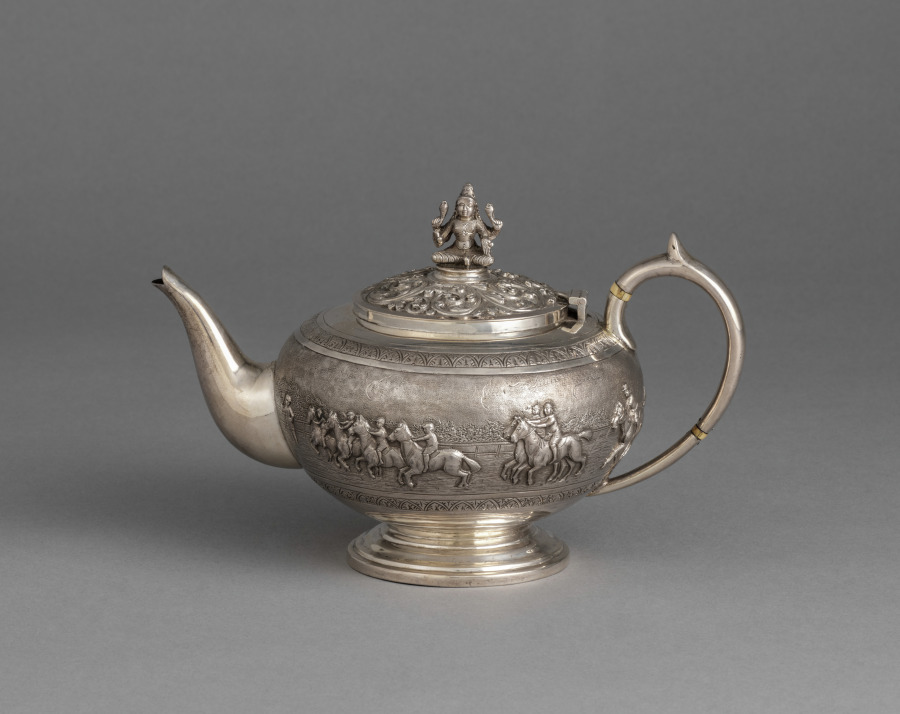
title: Teapot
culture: India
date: c. 1860–90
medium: silver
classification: Silver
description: Made either for export or to appeal to the British community living in colonial splendor in India, this pot is a rare testament to the influence of the British Empire on consumer design during the period. Shri Lakshmi, the Hindu goddess of wealth, crowns the vessel as an apt divinity to preside over the horse races depicted on the belly of the teapot.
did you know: The Hindu goddess of wealth on the lid has four arms, two of which hold lotus flowers.